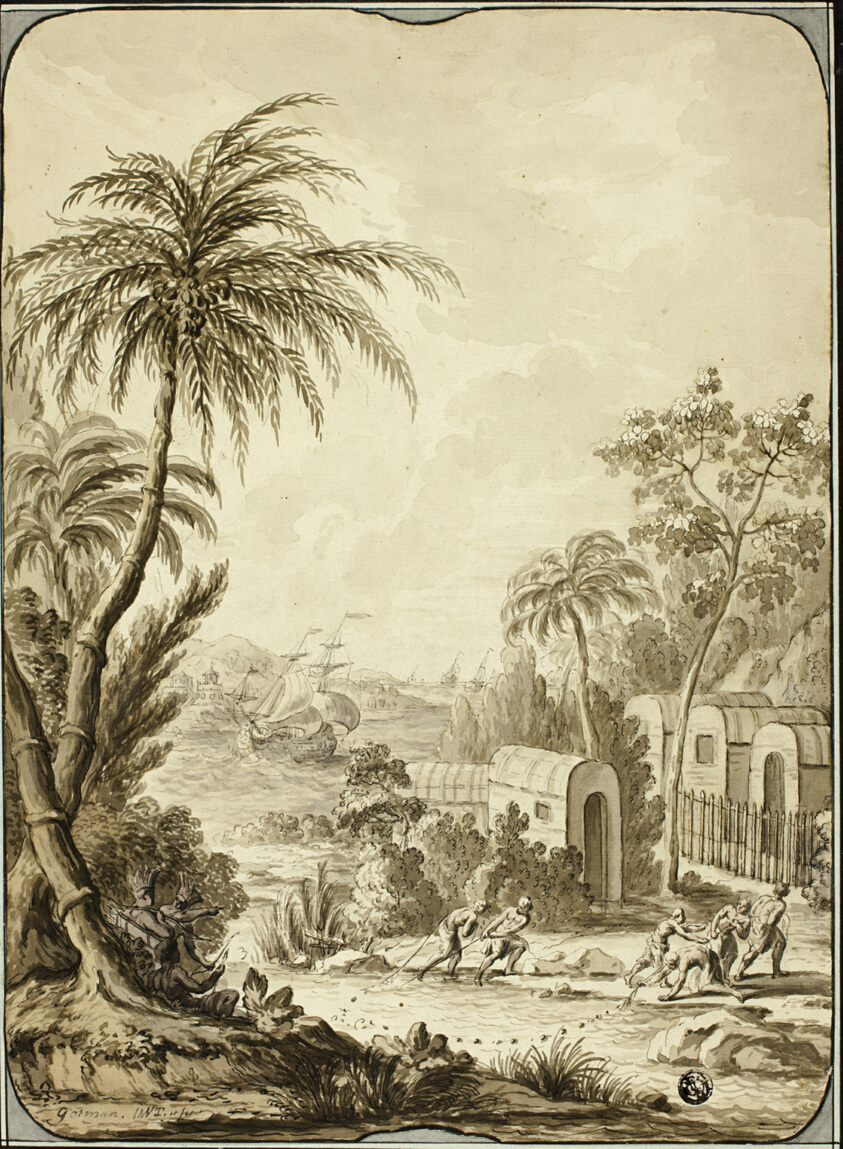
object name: Drawing and Watercolor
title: South Sea Island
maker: Lorens Gottman (Swedish, 1708-1779)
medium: Pen and black and brown ink, with brush and black, brown and pink wash, over traces of black chalk, on cream laid paper, laid down on ivory laid paper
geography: Sweden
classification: ink or chalk wash; drawings (visual works); prints and drawing